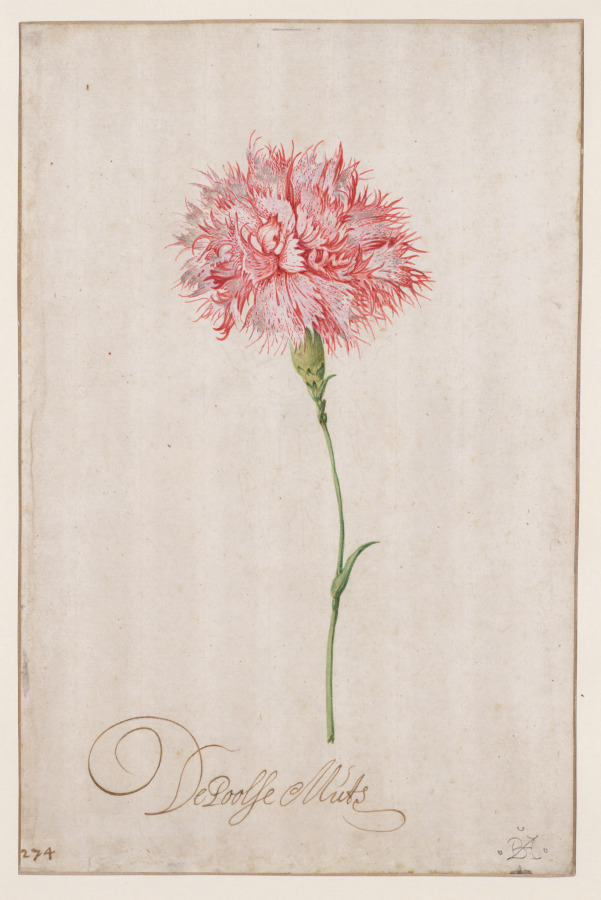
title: De Poolse Muts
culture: Netherlands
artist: Balthasar van der Ast (Dutch, 1593/94–1657)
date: c. 1620–30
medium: brush and watercolor in red, green, and yellow with white heightening or grey wash on antique laid cream paper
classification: Drawing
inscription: recto, De Poolse Muts in brown ink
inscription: monogrammed BA lower right in faded black ink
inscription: numbered 274 in brown ink lower left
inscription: verso, erased or rubbed chalk numbers, upper left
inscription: watermark: basel crozier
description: Still-life painting began in the Northern Netherlands (present-day Holland) around the turn of the 1600s. Still-life painter Balthasar van der Ast made this precise botanical study of a pink carnation as a reference that he could add later to a painting of an elaborate bouquet of flowers. Van der Ast inscribed the name “The Polish Cap,” on the sheet to suggest that the flower came from foreign lands.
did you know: According to Christian legend, carnations appeared when the Virgin Mary shed tears as Jesus carried the cross, thus the flower’s traditional association with Mother’s Day.